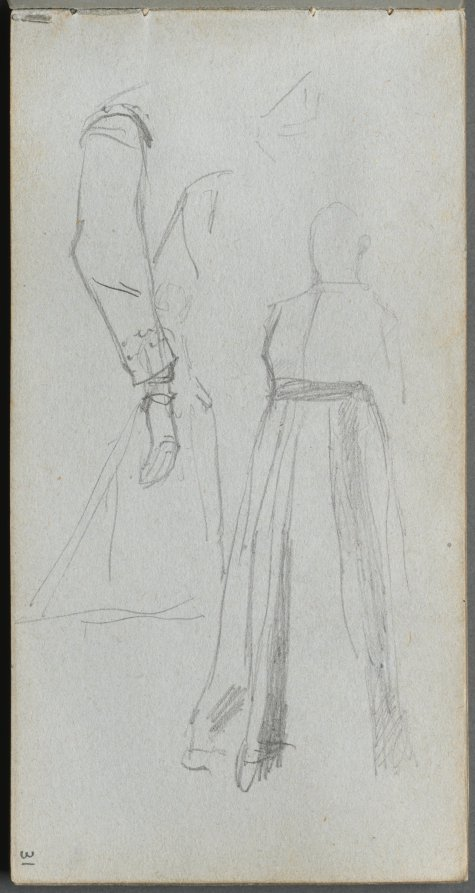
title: Sketchbook, page 31: Study of Figures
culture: France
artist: Ernest Meissonier (French, 1815–1891)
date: c. 1860s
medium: graphite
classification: Bound Volume